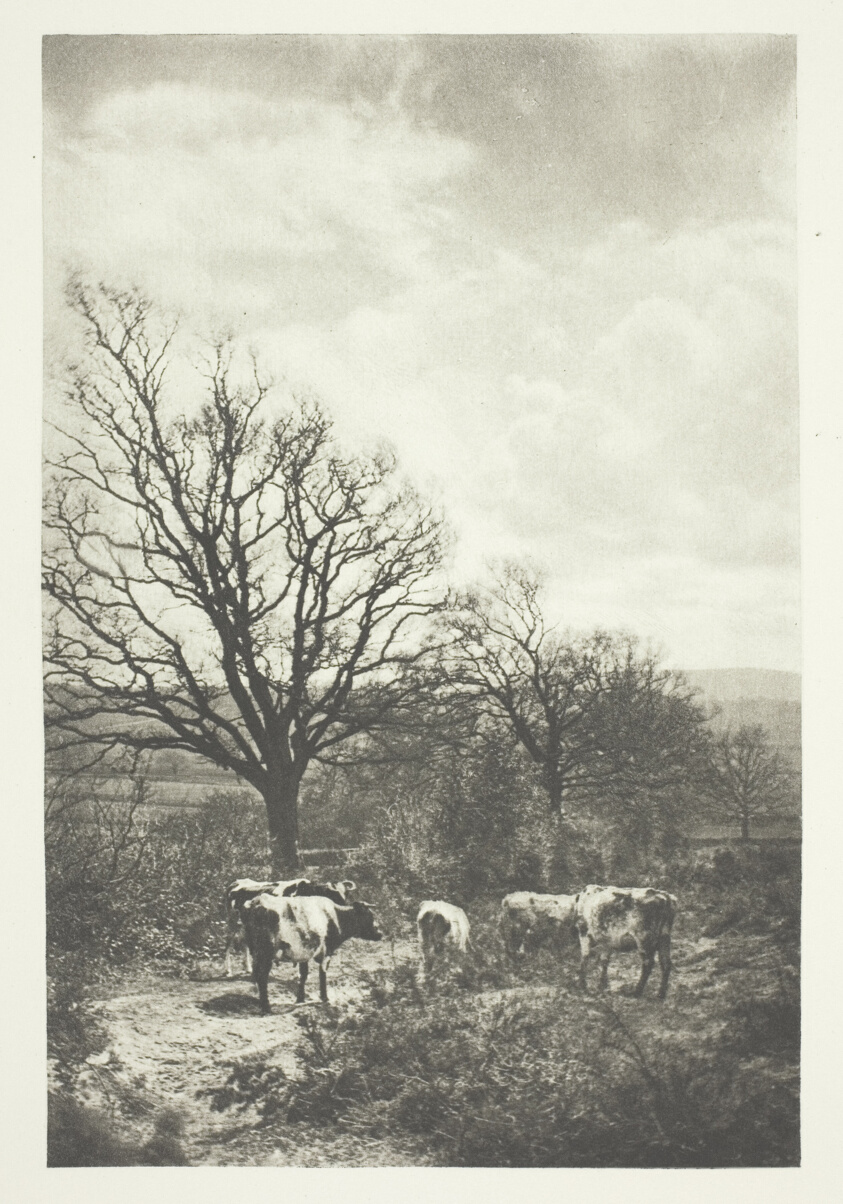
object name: Photograph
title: A Windy Corner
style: 19th century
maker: B. Gay Wilkinson (English, 1857–1927)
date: 1880/90, printed January 1891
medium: Photogravure, from "Sun Artists, Number 6" (1891)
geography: England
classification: photogravure; photomechanical process; photography; photograph